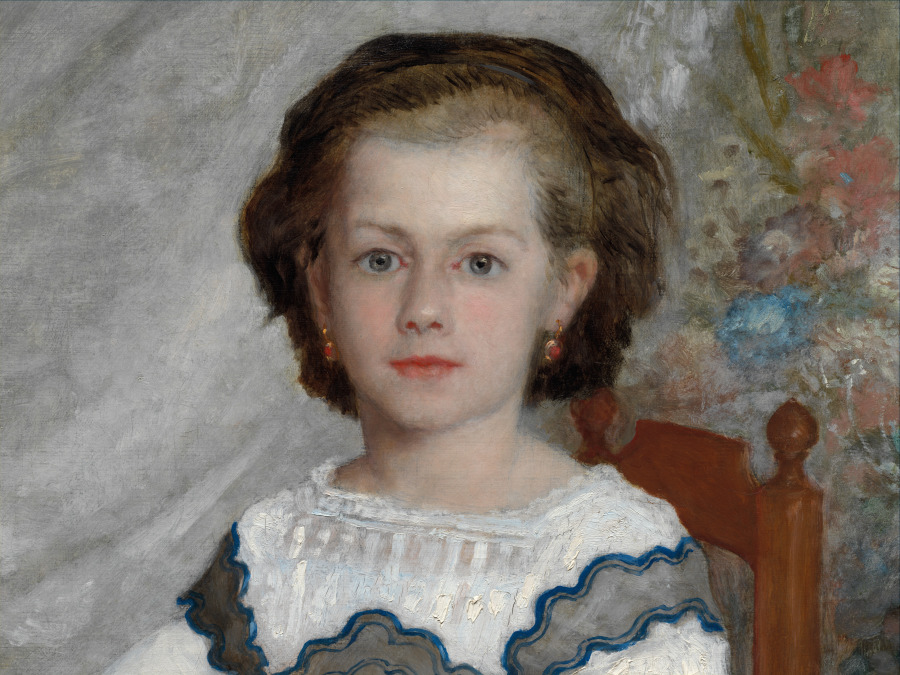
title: Romaine Lacaux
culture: France, 19th century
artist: Pierre-Auguste Renoir (French, 1841–1919)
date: 1864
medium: oil on fabric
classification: Painting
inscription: Signed center right: a. renoir / 1864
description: This painting may be Renoir's earliest signed canvas. Its sensitive display of color and light communicates an ideal of delicate, youthful beauty. The luminous tones of the background drapery and of the child's white blouse result from the artist's careful observation of reflected light and color on translucent materials. The delicate nuances of color, particularly in the young girl's face, reveal Renoir's previous training as a decorator of porcelain. He painted this portrait, commissioned by the vacationing Lacaux family, during his stay at an artist's colony in the village of Barbizon, near Paris.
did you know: The son of a poor tailor from Limoges, Renoir began his artistic career at age 13 as an apprentice to a porcelain painter.